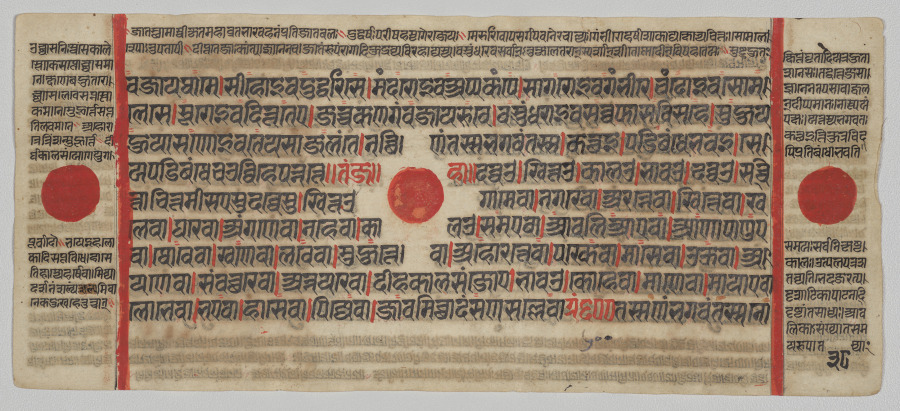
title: Text, Folio 38 (verso), from a Kalpa-sutra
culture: Western India, Gujarat, last quarter of the 15th century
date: c. 1475–1500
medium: Gum tempera, ink, and gold on paper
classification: Painting